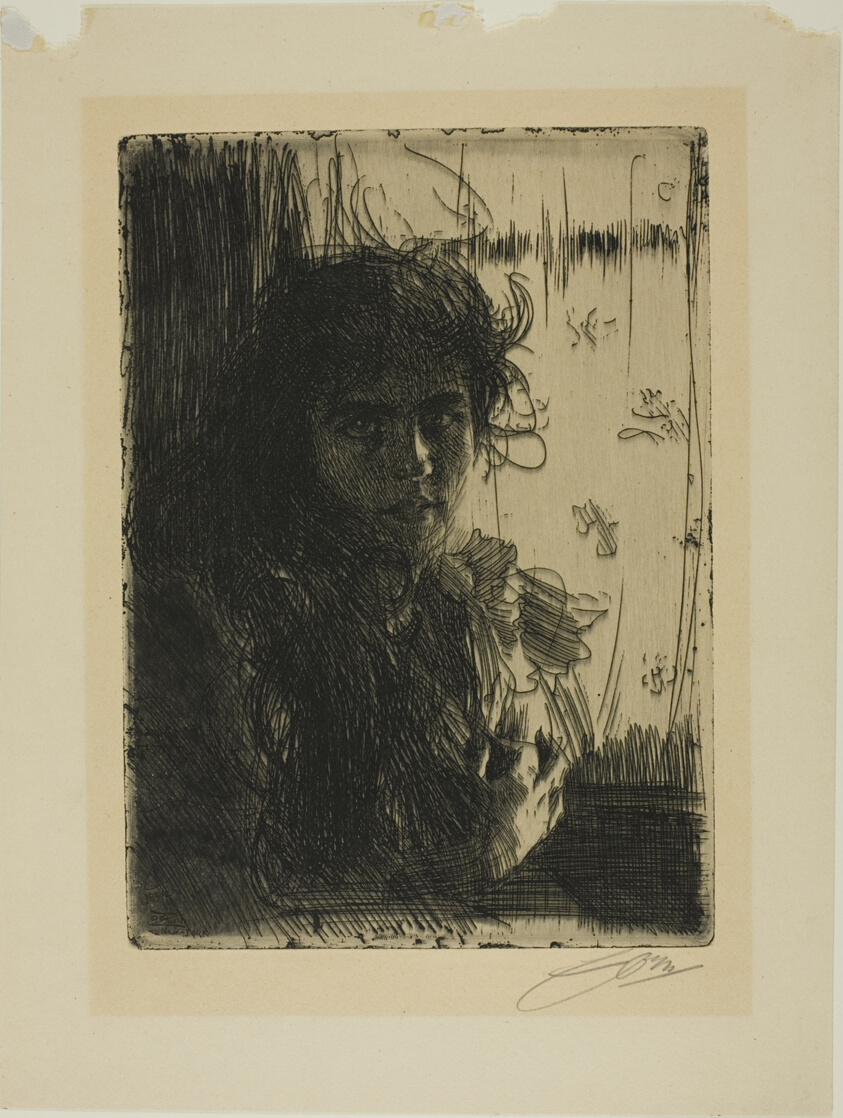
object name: Print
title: An Irish Girl or Annie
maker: Anders Zorn (Swedish, 1860-1920)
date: 1894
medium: Etching on cream wove paper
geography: Sweden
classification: etching; print; prints and drawing